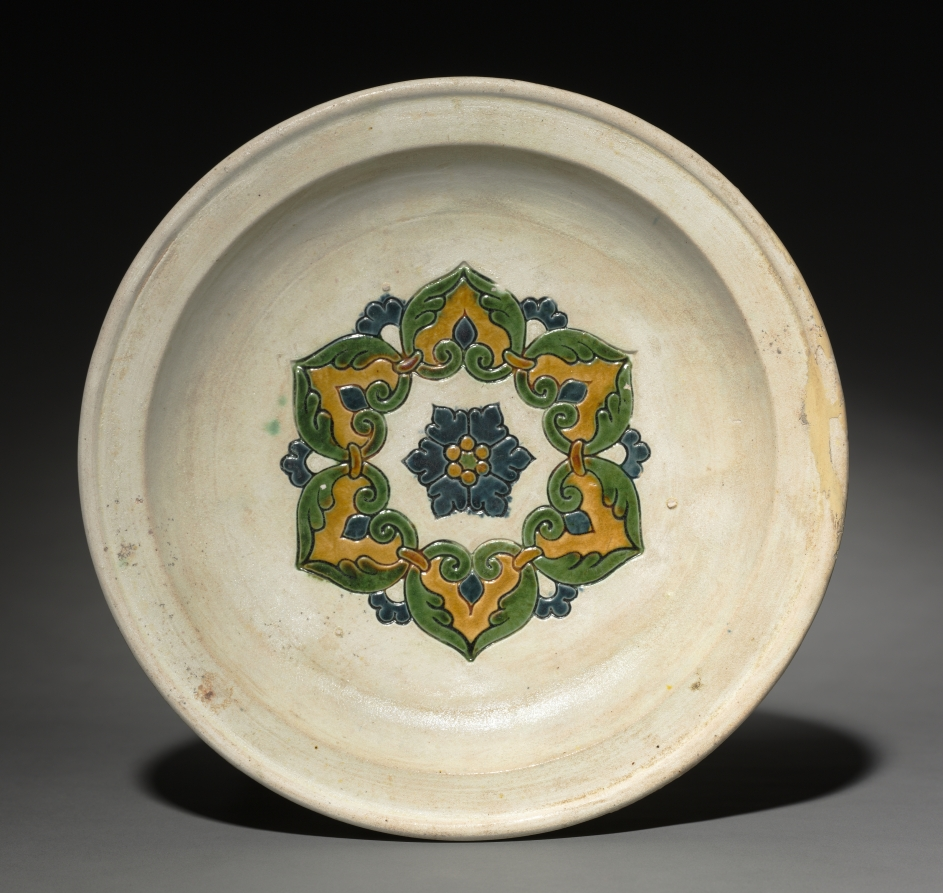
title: Footed Plate with Floral Medallion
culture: China, Tang dynasty (618-907)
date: early 700s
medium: glazed earthenware with impressed decoration, sancai (three-color) ware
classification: Ceramic